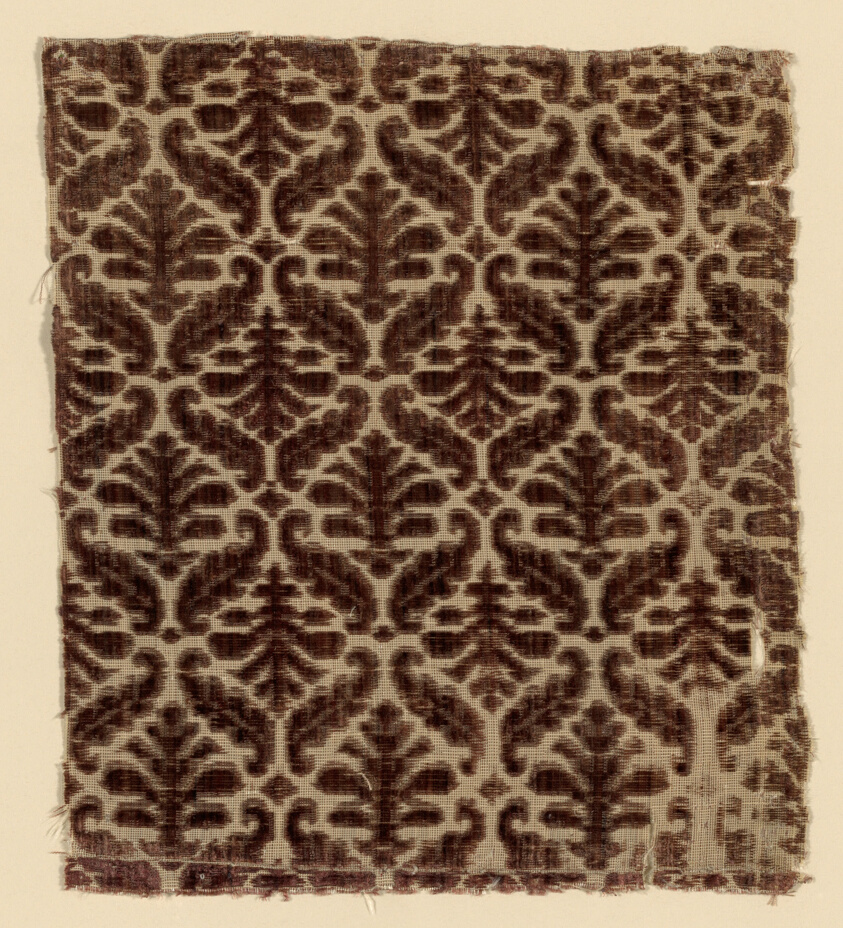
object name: Textile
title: Fragment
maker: Italy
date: 1625/50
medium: cisele voided cloth velvet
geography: Italy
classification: textile; weaving - velvet